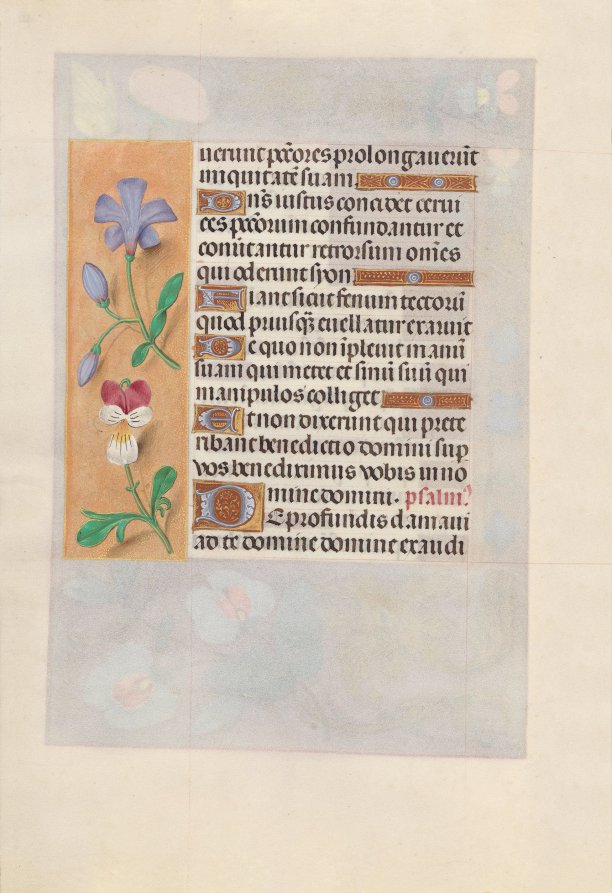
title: Hours of Queen Isabella the Catholic, Queen of Spain: Fol. 155v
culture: Flanders, Ghent and Bruges, late 15th century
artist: Master of the First Prayerbook of Maximillian (Flemish, c. 1444–1519)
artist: and Associates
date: c. 1500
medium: ink, tempera, and gold on vellum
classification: Bound Volume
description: This manuscript was illuminated by a circle of at least five highly organized manuscript painters active in the Flemish cities of Ghent and Bruges. The principal illuminator was Alexander Bening, who painted the majority of the book's miniatures. Manuscripts produced by this circle of artists are renowned for the decoration of their borders, which typically feature a rich variety of realistically-painted flowers, birds, and butterflies. This prayer book, called a book of hours, was intended not for a cleric, but for the private devotions of a lay person-in this case, Isabella the Catholic, Queen of Spain (1451-1504). Isabella's coat of arms embellishes the book's frontispiece. It is unlikely that the book was commissioned by the Queen herself; rather, she probably received it as a diplomatic gift from someone courting her patronage, perhaps Cardinal Francisco Jimenez de Cisneros. A Franciscan friar, Jimenez was dependent upon Isabella for his advancement, first to the post of Queen's confessor in 1492, and then to Archbishop of Toledo in 1495.